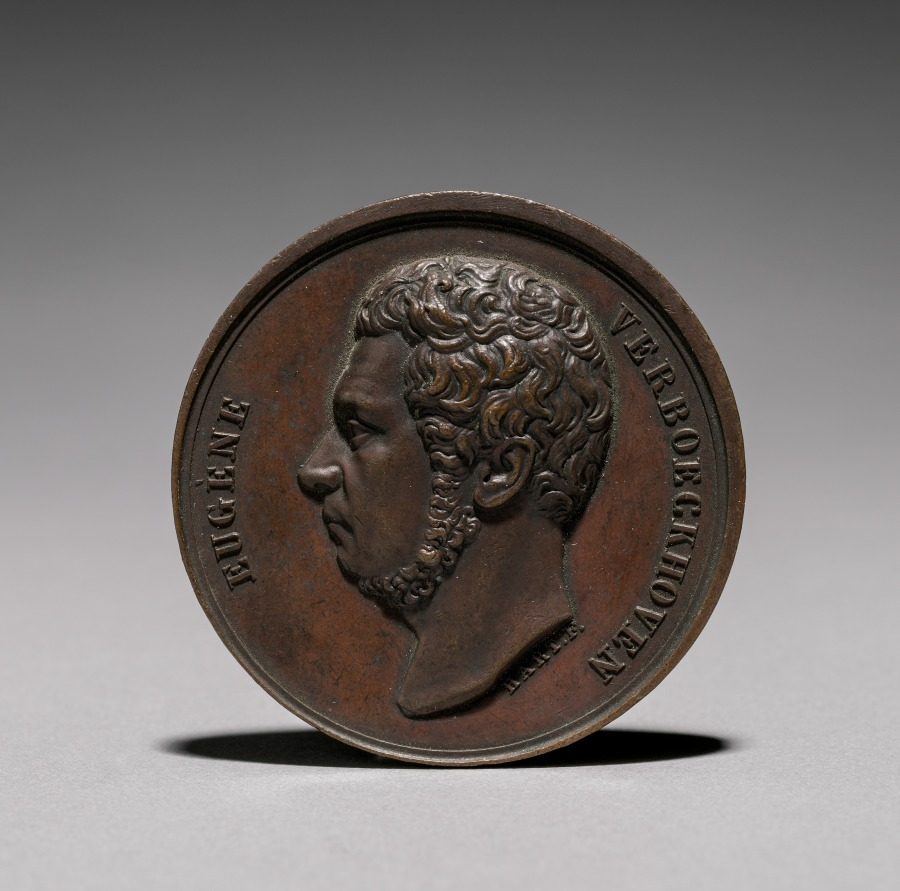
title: Medal: Eugene Verboeckhoven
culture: 19th century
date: 1800s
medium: bronze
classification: Metalwork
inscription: "EUGENE VERBOECKHOVEN"; signed: "Hart. F."